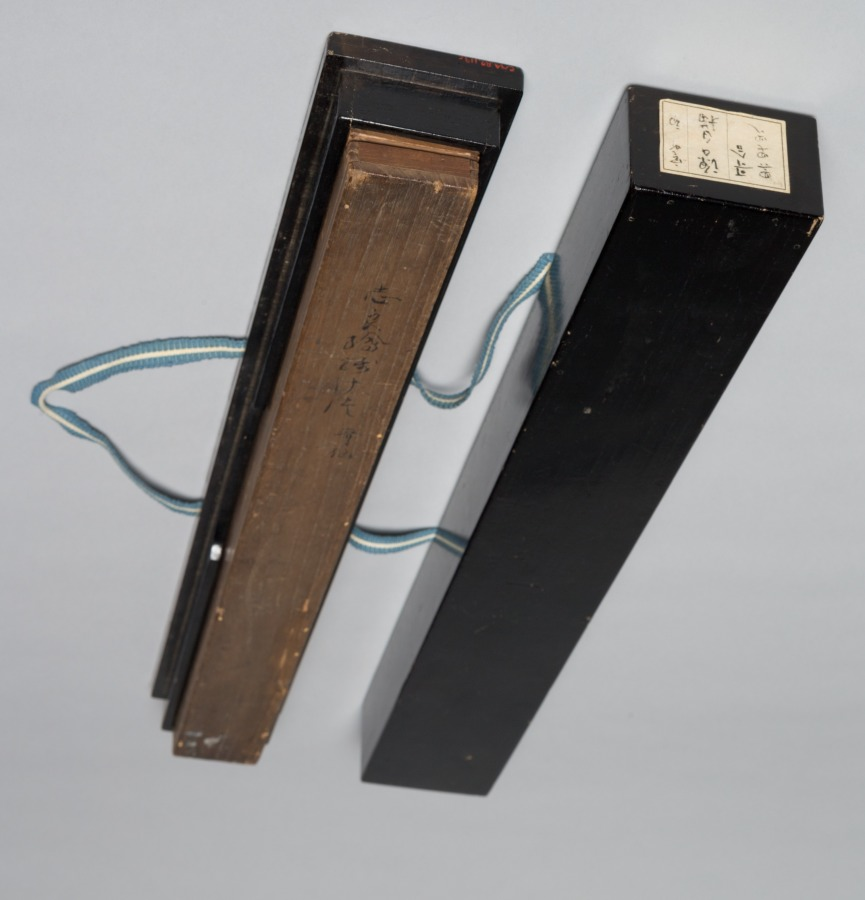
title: Section of an Illustrated Tale of Genji Poetry Contest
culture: Japan, Muromachi period (1392–1573)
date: 1400s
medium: section of a handscroll mounted as a hanging scroll; ink on paper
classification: Painting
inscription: 四十六番 左 ひげくろの大将 心さえ空にみだれし雪の［も」夜に ひとりさえつるかたしきの袖／ 四十七番 うきことを思ひさわ げばさまざまに くゆるけむりぞ いとど たち そふ／ 四十八番 すがくれてかず にも あらぬ かりのこを いづかたにかはとりかくすべき／ 右 雲井のかり かぎりとてわすれがたきを わするるも こや世に なびくこころな るらむ／ あさきなを いひ ながしける かわ ぐちは いかが もらしし せきのあらがき／ あわれをもいかに しりてか なぐさ めむ あるや 恋しき なきや かなしきに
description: This hanging scroll was once part of a handscroll depicting a waka (thirty-one syllable verse) poetry contest between characters from the 11th-century literary classic Tale of Genji. In this section, a woman known informally as Kumoi no kari, or “Goose in Fog,” after a lovelorn line she hums in the novel, is pitted against Higekuro no taishō, or “General Blackbeard.” Three of his poems, numbered 46 to 48, from “The Handsome Pillar” chapter appear over his image. The subsequent three poems inscribed above Kumoi no kari are presented as her “responses,” and come from "The Plum Tree Branch", “New Wisteria Leaves”, and "Evening Mist" chapters.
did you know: General Blackbeard laments having smelly ash poured upon him by his angry wife in one of the poems.